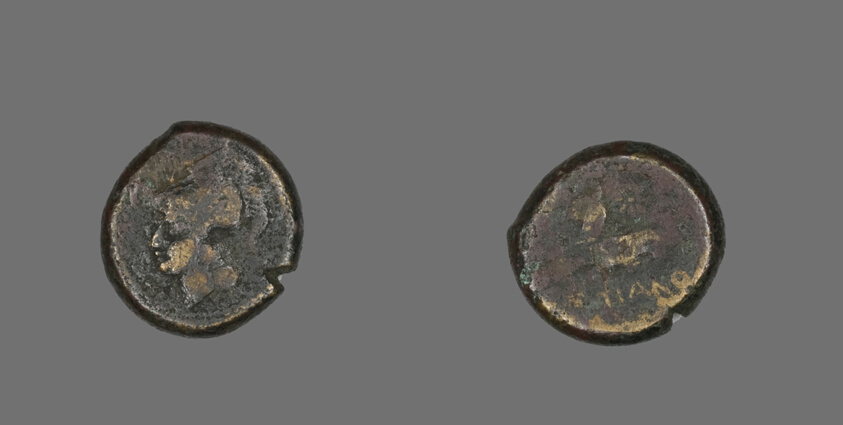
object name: Coin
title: Coin Depicting the Goddess Athena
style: greek, ancient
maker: Greek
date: about 300-268 BCE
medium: Bronze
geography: Greece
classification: coin; ancient art; struck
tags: Athena